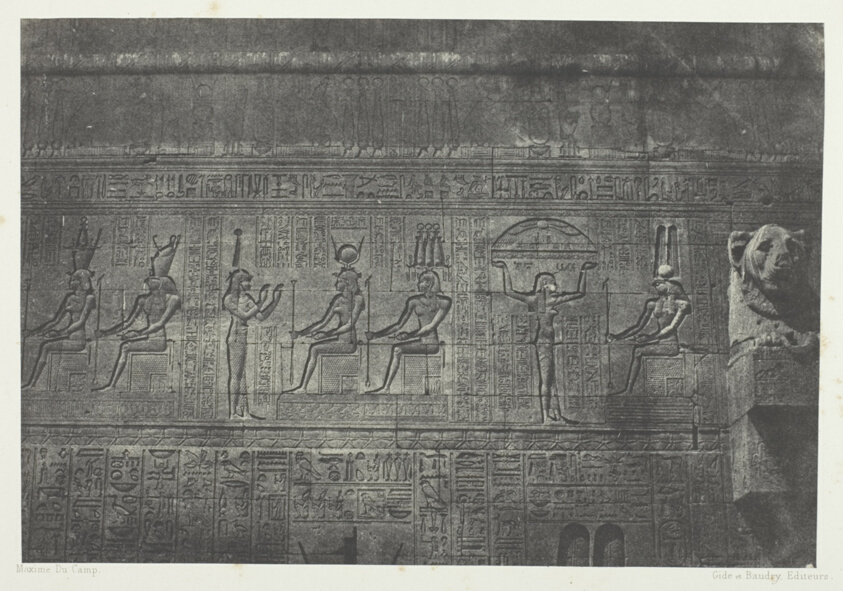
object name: Photograph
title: Grand Temple de Dendérah (Teutyres), Sculptures de la Façade Postérieure; Haute-Egypte, plate 20 from the album "Egypte, Nubie, Palestine et Syrie" (1852)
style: 19th century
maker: Maxime Du Camp (French, 1822–1894)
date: 1849/51, printed 1852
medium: Salted paper print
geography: France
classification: salted paper print; photographic process; photography; photograph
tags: Collected by Hugh Edwards, Egypte, Nubie, Palestine et Syrie